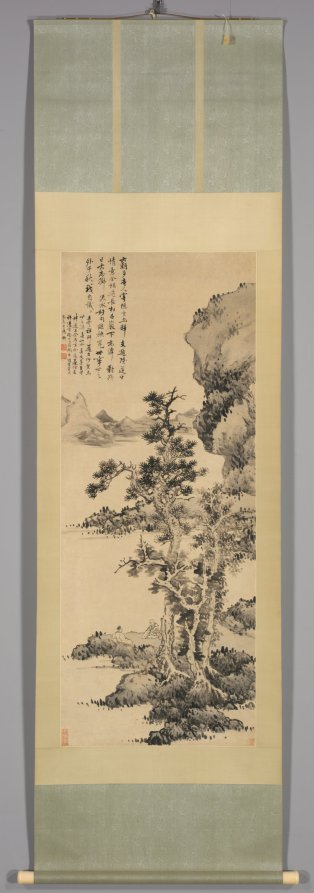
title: Zhi and Xu's Pure Conversation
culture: China, Ming dynasty (1368–1644)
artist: Lan Ying (Chinese, 1585–after 1664)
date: 1643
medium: Hanging scroll; ink on paper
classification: Painting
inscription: 六朝多奇人，寄隱玄與釋。/ 支遁許道士，情意合相適。/ 長松古巖下，高譚對終日。/ 大志擲流水，好句聯袂覓。/ 世事世之外，千秋我自識。 五雲禪師道古行潔，與世無涉。喜山水，喜文 墨。至老神逾王。余與方外交，遂作支許清言 圖，乞為開示。 蝶叟藍瑛癸未七月杪。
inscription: 2 additional seals of Cheng Qi 程琦 (1911–1988)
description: Lan Ying’s painting is a gift to his friend, the Chan monk Wuyun, in which he depicted two sages of the Six Dynasties period: the Buddhist monk Zhidun (314–366 CE), and the Daoist priest Xu Xun (265–420 CE). Meant to be understood as an analogy of the friendship between artist and monk, the painting also offered a retreat into the past, a year before the fall of the Ming dynasty. A professional painter born in Hangzhou, Lan Ying is traditionally considered a last representative of the Zhe school. Lan wrote poetic inscriptions and interacted with the literatus Chen Jiru (1558–1639).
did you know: This painting serves as an analogy of the friendship between artist and monk.